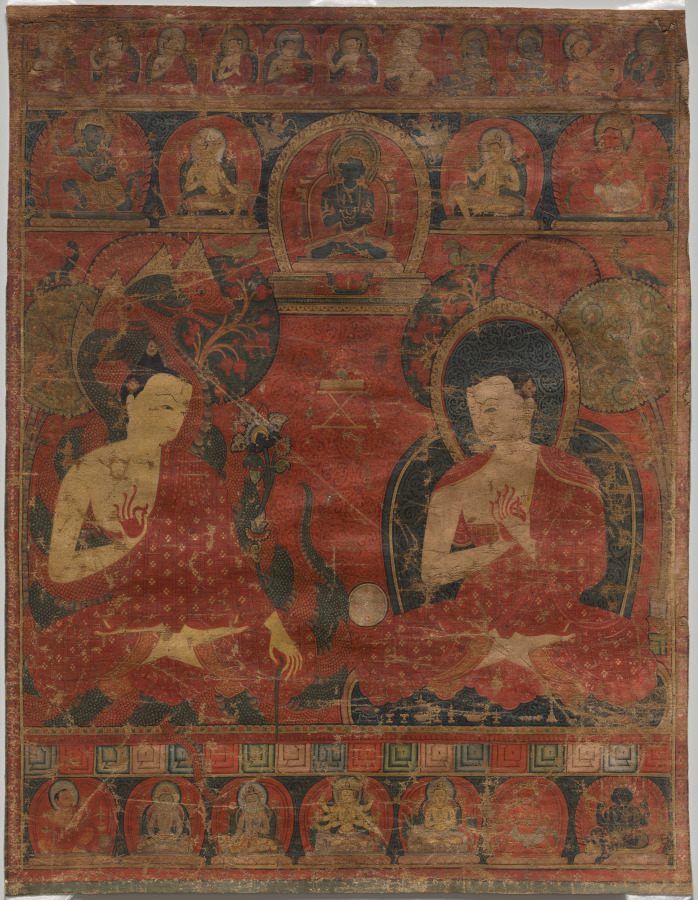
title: Nagarjuna (c. 150–250 CE) with a Buddhist Master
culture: Nepal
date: c. 1300s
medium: gum tempera on sized cotton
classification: Painting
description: Nagarjuna, the Buddhist philosopher from southern India, sits on his eponymous red and black serpents, or naga. His interlocutor may be his disciple Aryadeva. A volume of the Perfection of Wisdom, honored with flowers, is on a golden bookstand between their heads. The figures sit beneath flowering and fruiting trees with peacocks and parrots, evoking the landscape of India. Lineage masters of the Sakya order of Buddhism are aligned in the top row, beginning with Virupa at the upper right. The monk who was the donor of this painting is in the lower left corner.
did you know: The Bodhisattva of Wisdom, who was Nagarjuna's teacher, is in the central 8-armed figure in the bottom row.